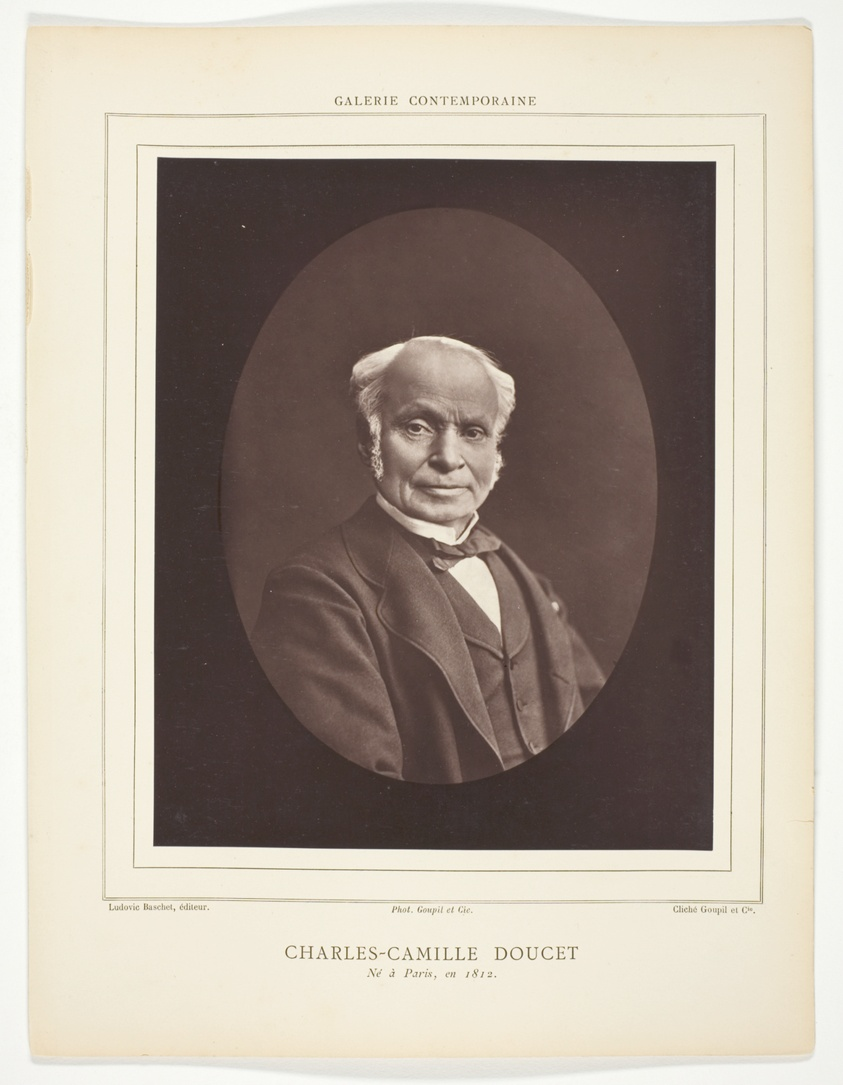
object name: Photograph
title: Charles-Camille Doucet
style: 19th century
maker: Goupil et Cie; French, active after 1855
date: c. 1880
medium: Woodburytype, from the periodical “Galerie Contemporaine Littéraire, Artistique”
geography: France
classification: woodburytype; photomechanical process; photography; photograph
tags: Collected by Hugh Edwards, Paris, Contemporaine Littéraire